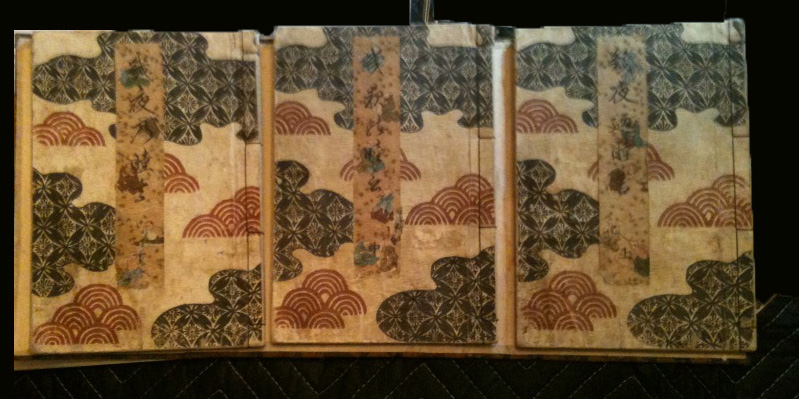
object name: Book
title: Ikuyo no mutsugoto (Nocturnal pillow talk)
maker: Utagawa Kunisada I (Japanese, 1786-1864)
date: c.1831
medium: Three color woodblock printed volumes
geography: Japan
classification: book